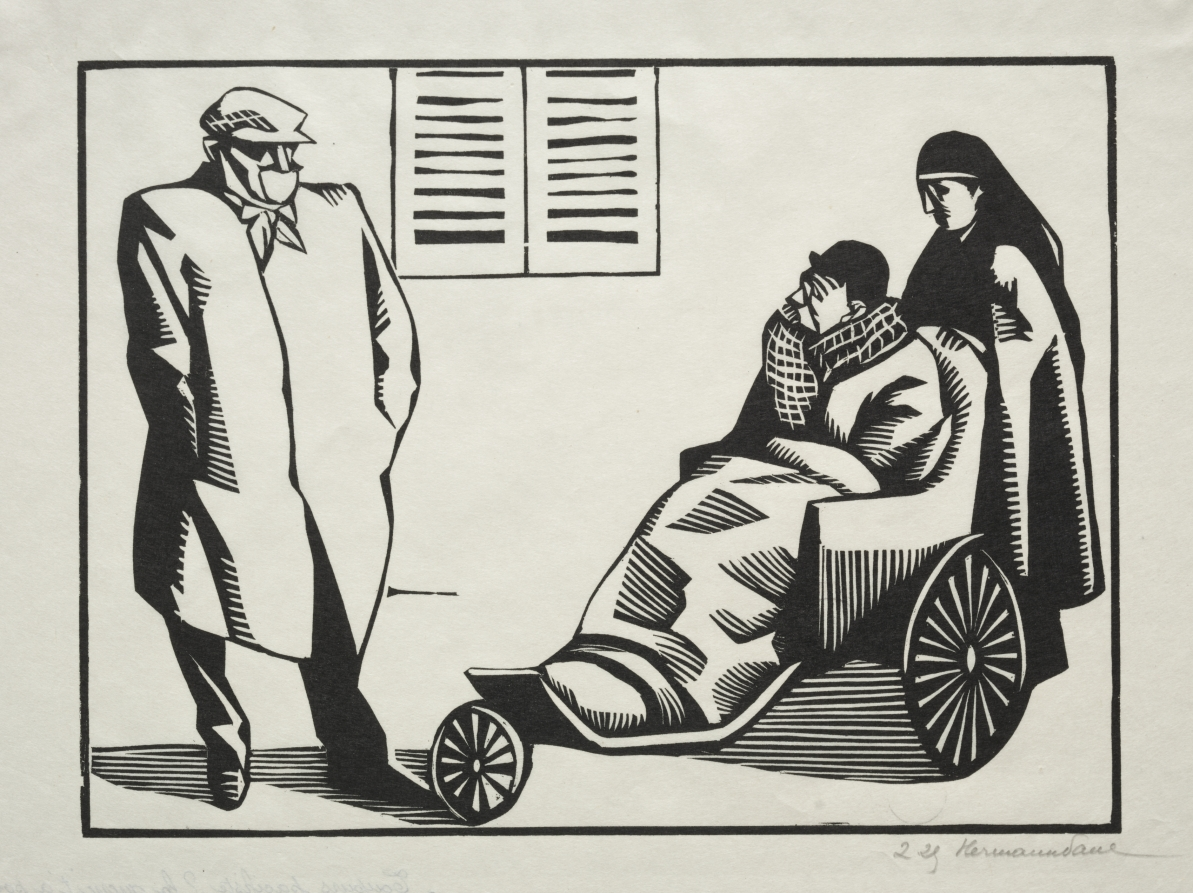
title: Toujours pacifiste? la guerre t'a pourtant reussi!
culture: France, 20th century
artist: Hermann Paul (French, 1864–1940)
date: c. 1920s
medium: woodcut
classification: Print